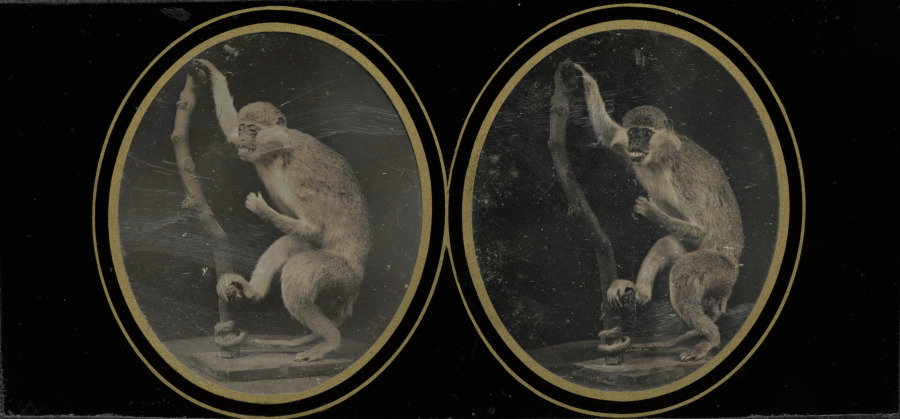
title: Monkey on Branch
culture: America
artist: attributed to Louis Jules Duboscq-Soleil (French, 1817–1886)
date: c. 1855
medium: stereo daguerreotype, sixth plate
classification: Photograph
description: A stereoscopic viewer was invented by David Brewster in 1849, but he could not get British manufacturers interested, so took it to Paris in 1850. There, he showed it to Louis Jules Duboscq-Soleil, who not only manufactured it but also began making his own stereoscopic daguerreotypes including this one. Along with natural history specimens, Duboscq-Soleil also photographed painted portraits and sculptures.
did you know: Among the avid fans of the stereoscopic daguerreotypes of Louis Jules Duboscq-Soleil was Queen Victoria of Great Britain.